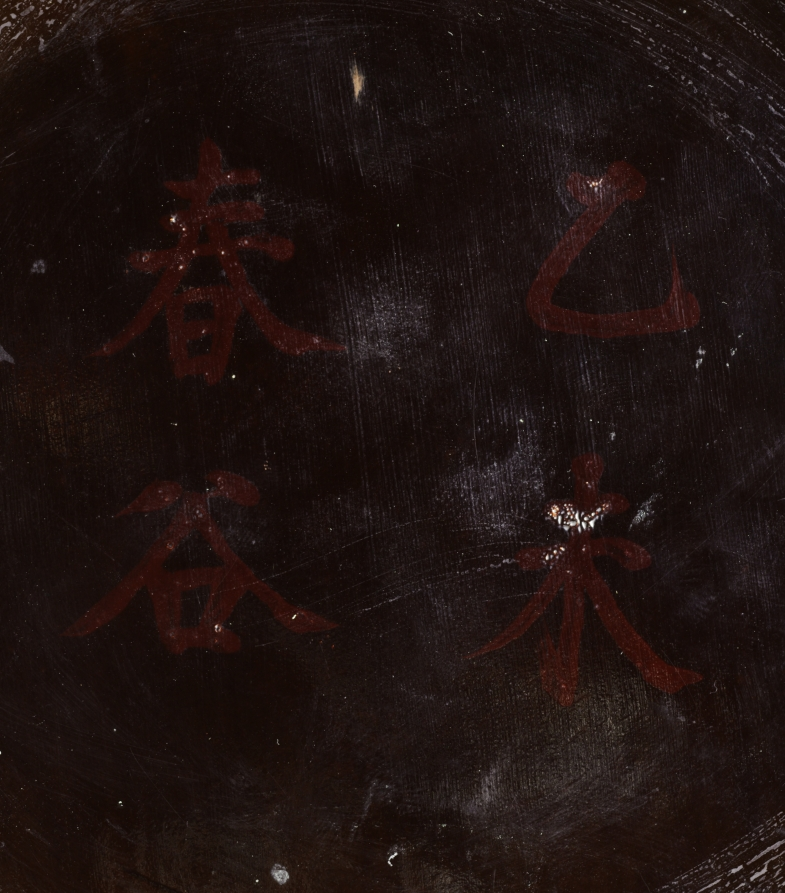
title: Fluted Tray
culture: China, Yuan dynasty (1271-1368) - Ming dynasty (1368-1644)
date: 1300s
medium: red lacquer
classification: Lacquer